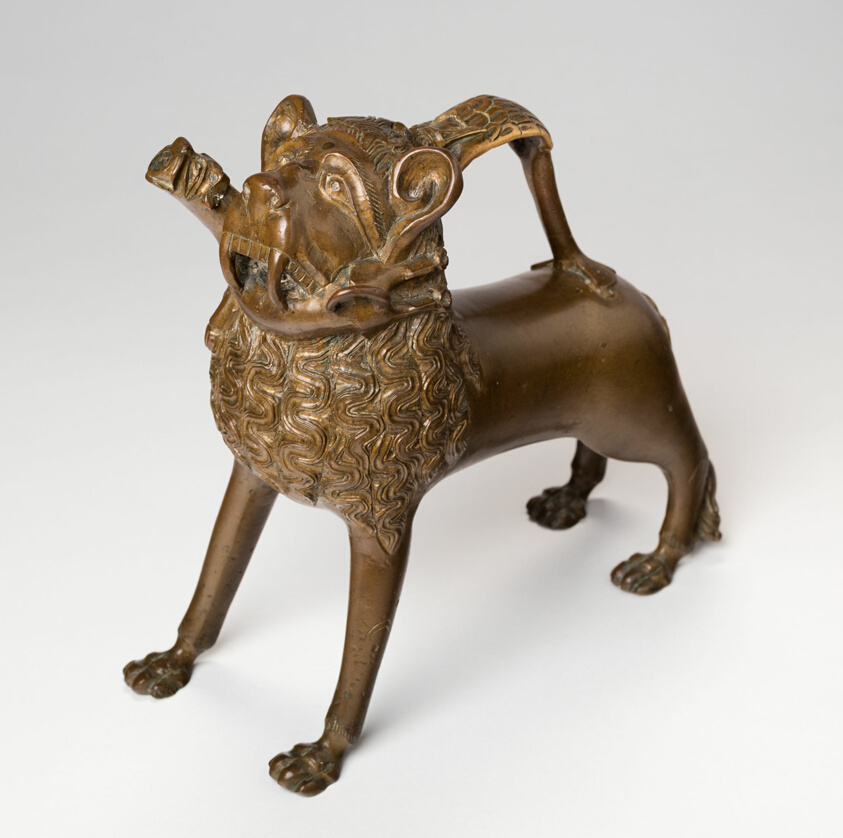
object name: Decorative Arts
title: Aquamanile in the Form of a Lion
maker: Follower of Johannes Apengeter; (German, active about 1325-50)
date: c. 1350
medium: Copper alloy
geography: Germany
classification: decorative arts